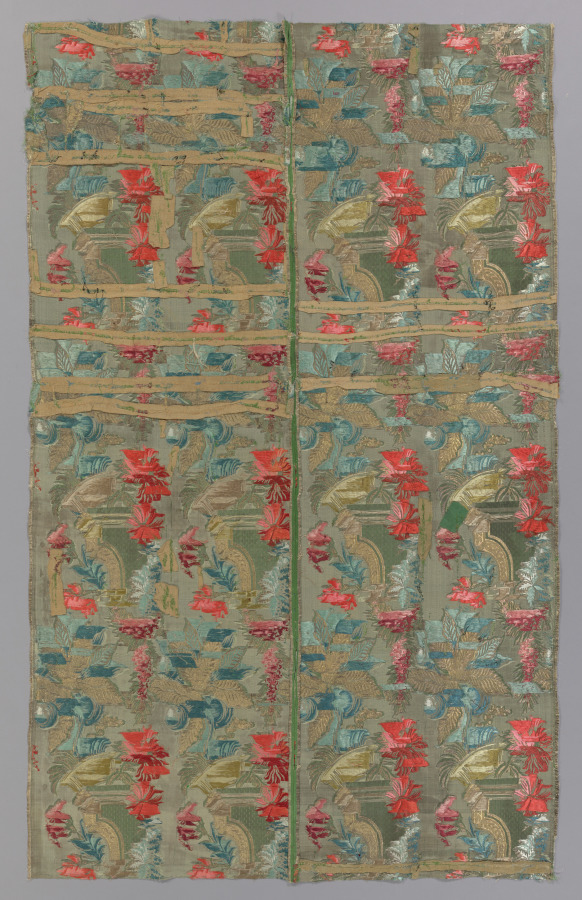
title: Silk Brocade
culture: Italy, Venice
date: late 1600s - early 1700s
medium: brocade; silk and metal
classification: Textile